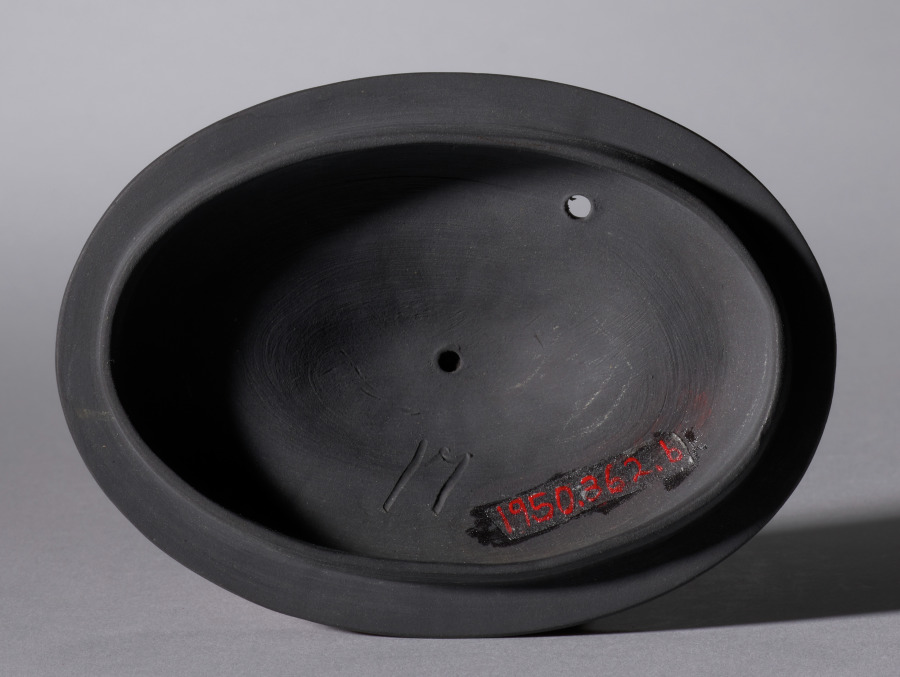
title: Teapot (cover)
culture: England, 19th century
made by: Elijah Mayer (British, c. 1770–1805)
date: c. 1810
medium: black basalt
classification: Ceramic